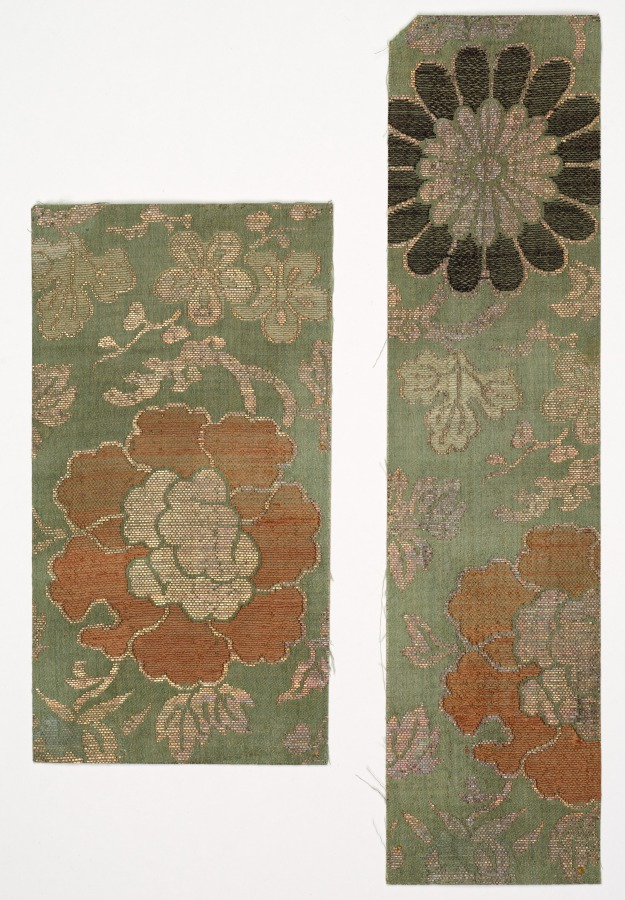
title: Textile Fragments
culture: Japan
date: 1800s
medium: silk, metallic thread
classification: Textile